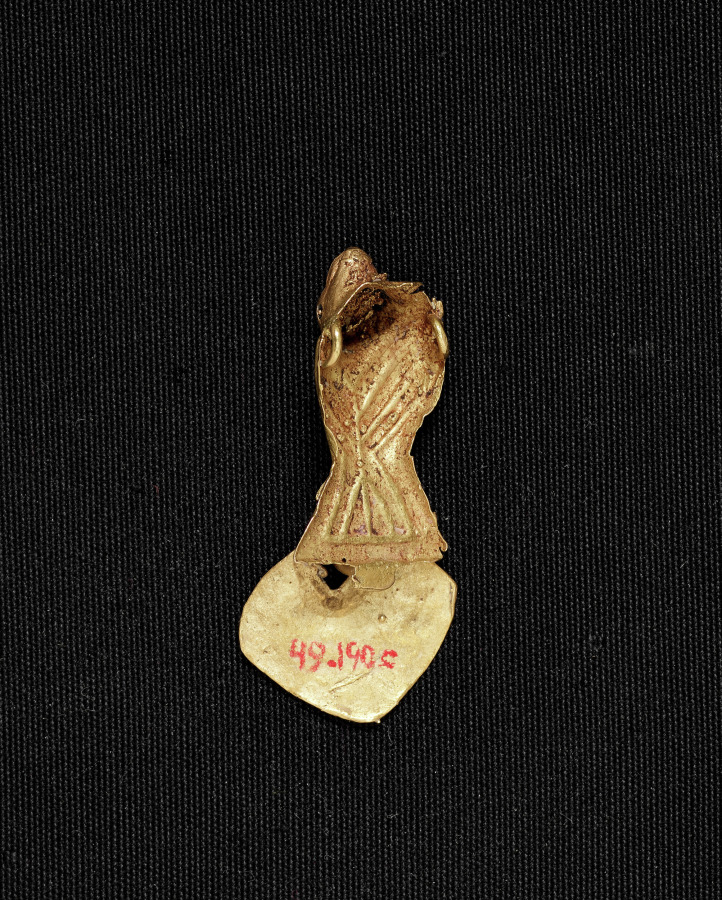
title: Bird Bead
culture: Colombia, Muisca style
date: c. 900–1550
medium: cast gold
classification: Jewelry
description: Muisca metalwork divides into two categories: ornaments to be worn, such as these, and offering figurines, in the case to the right. The elaborate bird pendant features delicate herringbone moldings, openwork patterns, and wing details-all part of the wax model from which the pendant was cast (see nearby computer animation). The dangles were attached after casting.